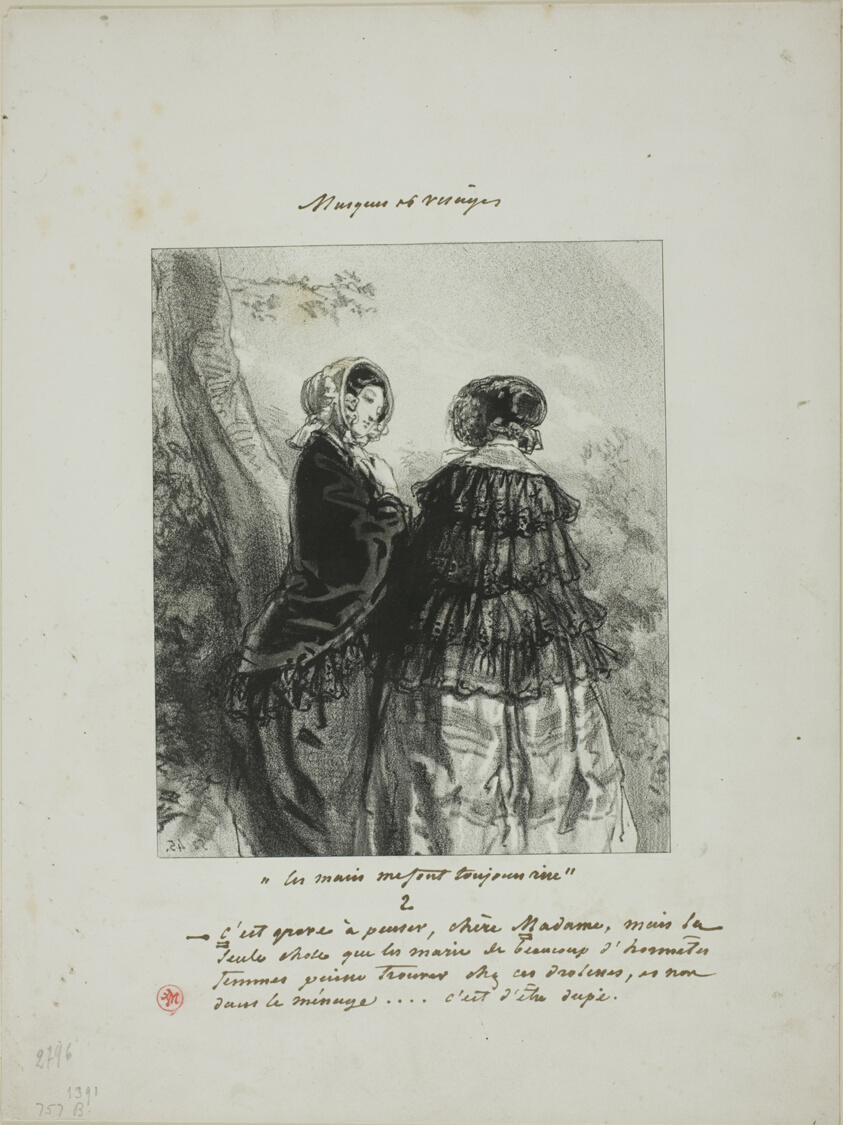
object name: Print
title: Husbands Always Make Me Laugh: It's hard to believe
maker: Paul Gavarni (French, 1804-1866)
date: 1852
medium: Lithograph in black on ivory wove paper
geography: France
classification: lithograph; print; prints and drawing